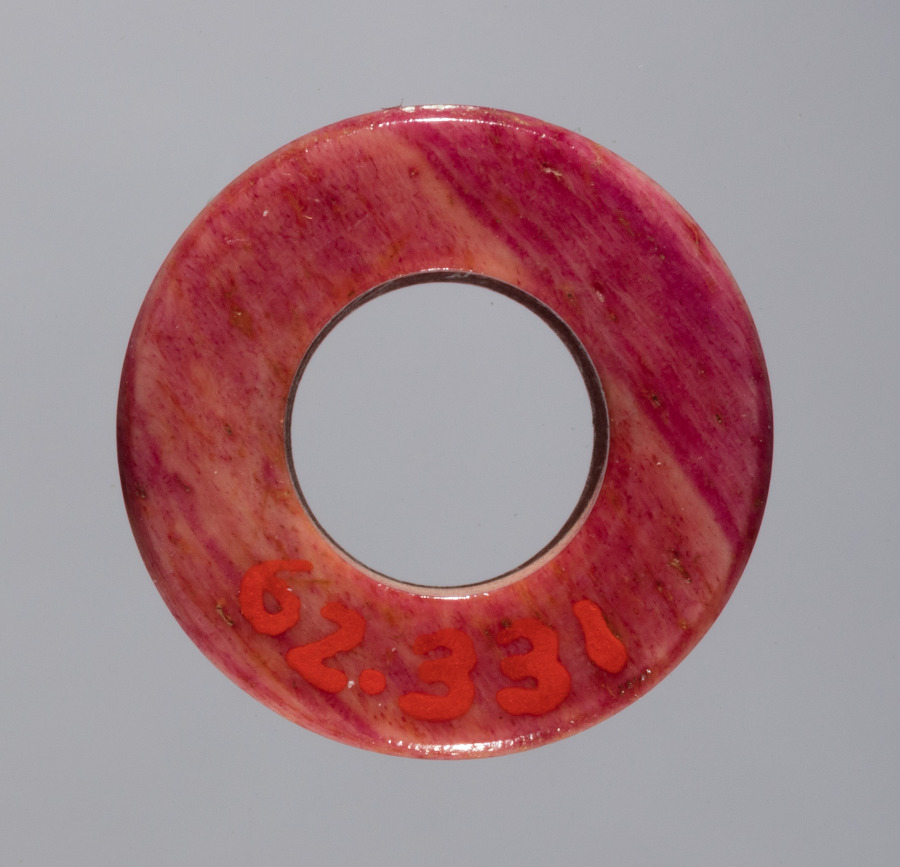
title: Spindle Whorl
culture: Iran, early Islamic period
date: 700s - 900s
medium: bone, incised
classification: Spindle Whorl